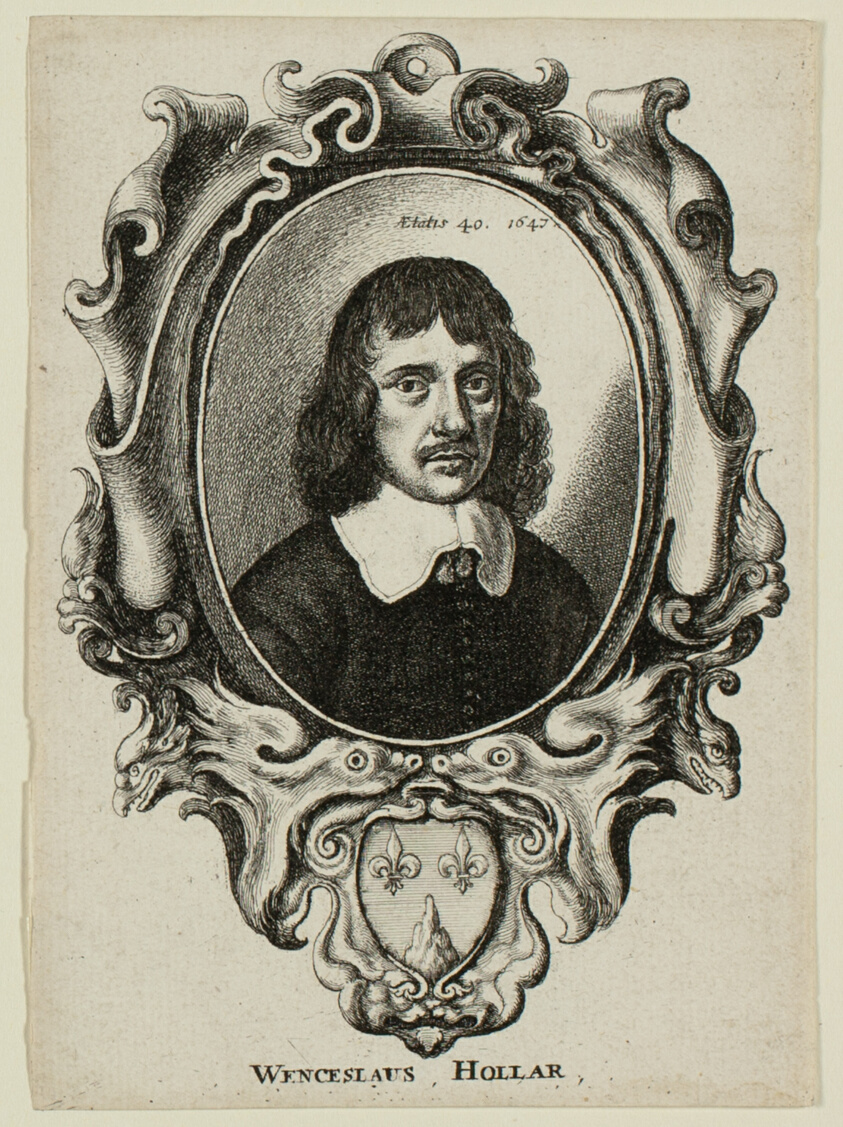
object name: Print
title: Self-Portrait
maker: Wenceslaus Hollar (Bohemian, 1607-1677)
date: 1647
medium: Etching in black on ivory laid paper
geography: Bohemia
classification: etching; print; prints and drawing